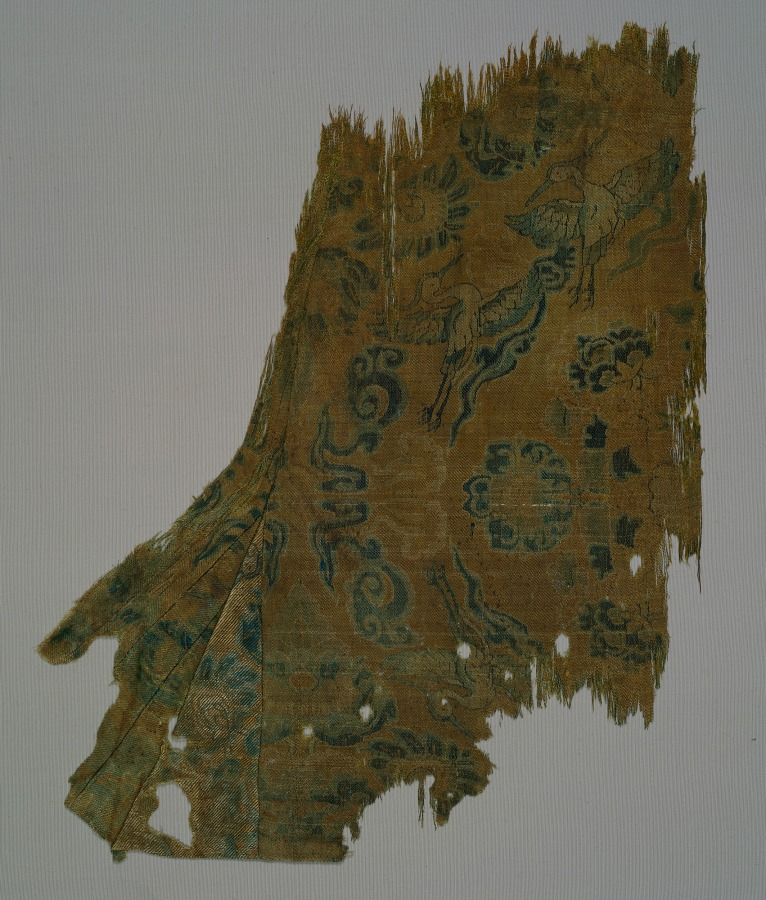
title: Fragment from a Garment (larger fragment)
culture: China, Lao dynasty (907-1125), 10th century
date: 900s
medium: weft-faced compound twill, silk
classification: Textile